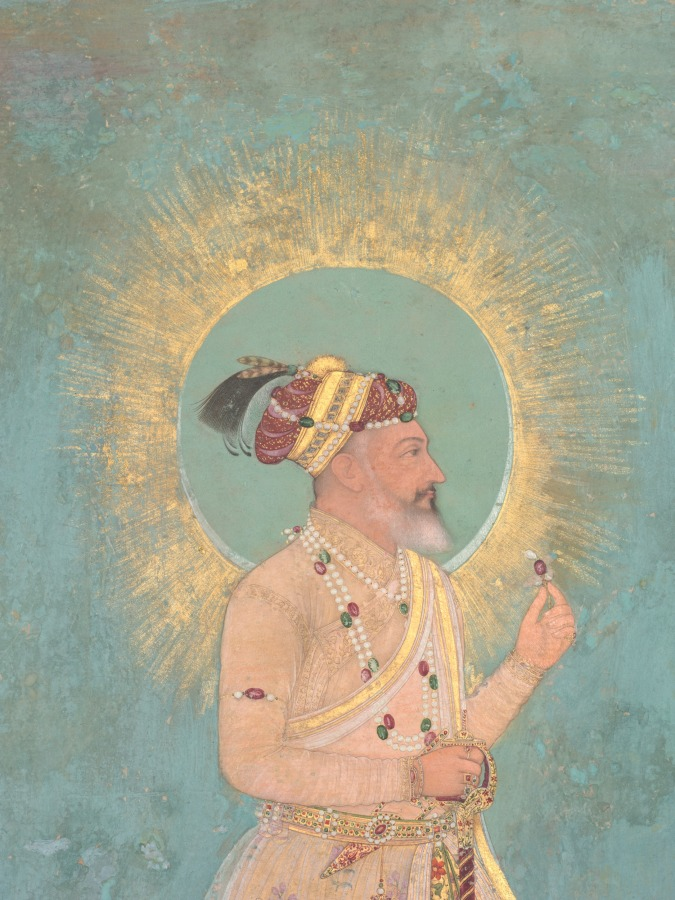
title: Shah Jahan holding a spinel and a long Deccan sword, from the Late Shah Jahan Album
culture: India, Mughal, 17th century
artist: attributed to Hashim (Indian, active 1598-c.1650)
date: c. 1650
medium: Gum tempera and gold on paper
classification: Painting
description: This page came from an imperial album assembled for Shah Jahan toward the end of his reign. Only portraits of the emperors have angels hovering with a crown in the top border along with the predator peacefully paired with his prey below. Shah Jahan chose to link these symbols of peace and justice with divine sanction for his rule, as indicated by the light of the sun and moon behind his head. Royal retainers carry emblems of sovereignty in the left border. Imperial Mughal painting reached a pinnacle of refinement and formality under Shah Jahan. The artists reveal astonishing skill in their ability to render the subtle texture of the feather in his turban crest, the gleam of every jewel, the softness of his beard, and the delicacy of his costly translucent muslin robe. In his hand Shah Jahan holds a ruby-like gemstone called a spinel, prized among the Mughals for its talismanic properties of protection during battle.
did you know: The finest fabric was the most transparent, like the Emperor’s New Clothes.